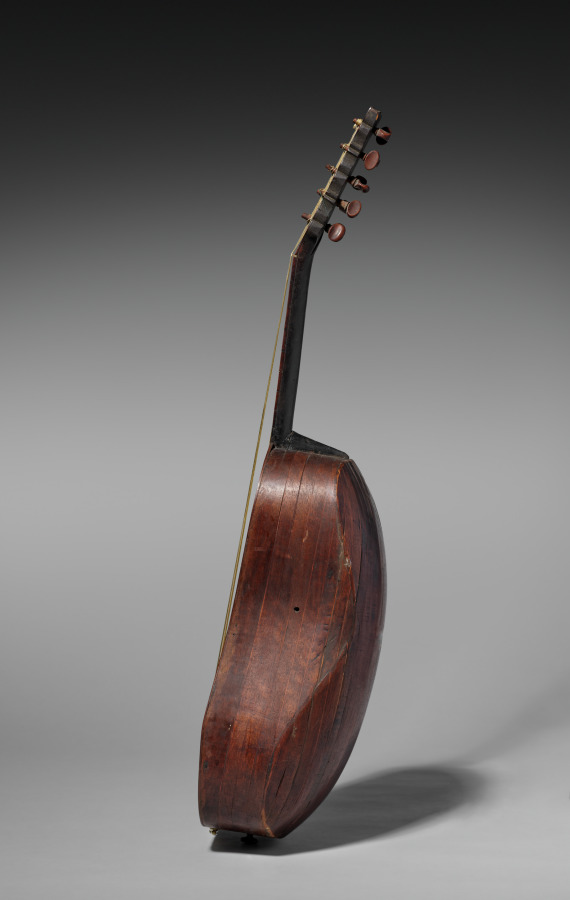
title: Chittara Battente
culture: Italy, 15th century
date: 1400s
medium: wood, paper?, sound hole, bone bridge, sheet metal inlay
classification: Musical Instrument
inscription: bears broken ticket of parchment.